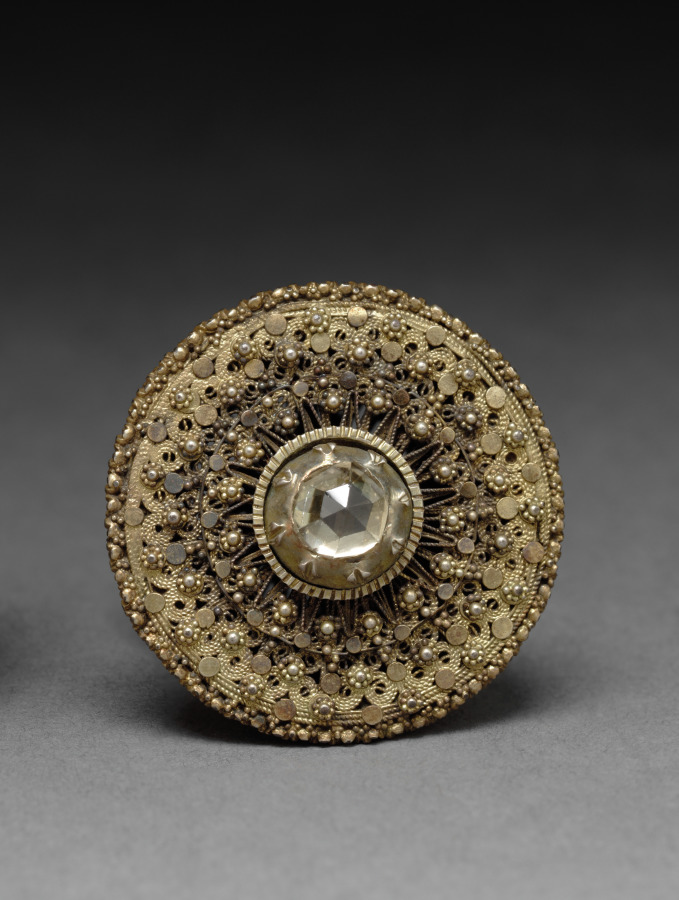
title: Earring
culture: Burma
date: 1800s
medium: silver gilt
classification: Jewelry